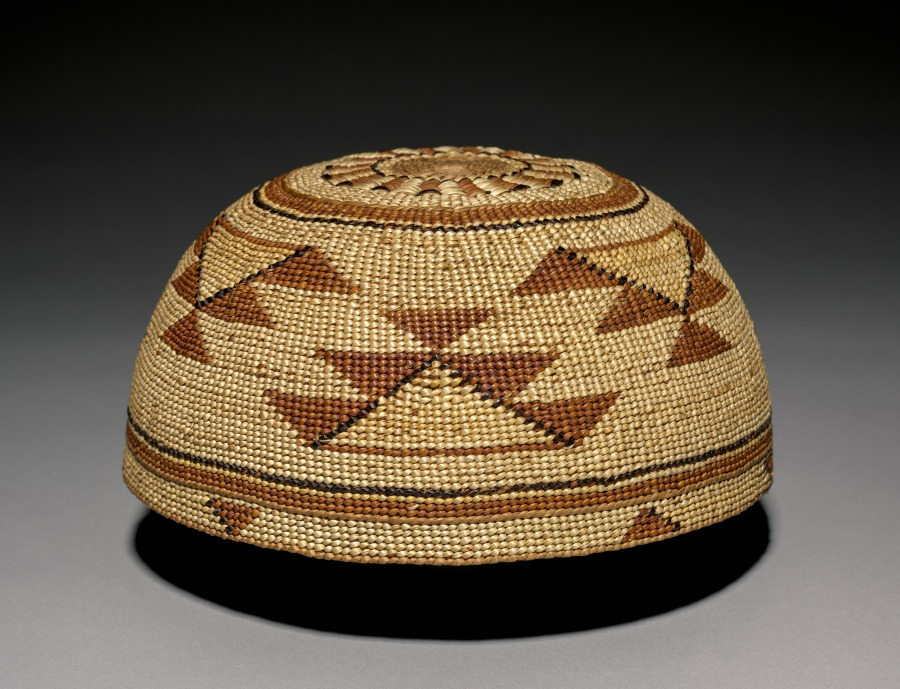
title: Hat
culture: California, late 19th- early 20th century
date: c 1875–1917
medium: plain-twined hazel with decoration in beargrass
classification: Basketry